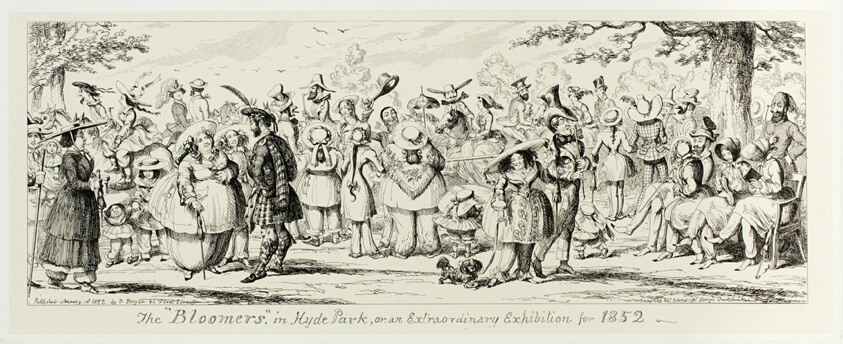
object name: Print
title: The "Bloomers" in Hyde Park, or an Extraordinary Exhibition for 1852 from George Cruikshank's Steel Etchings to The Comic Almanacks: 1835-1853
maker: George Cruikshank (English, 1792-1878); published by Pickering & Chatto (English, 19th century)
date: 1852, printed c. 1880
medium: Steel etching in black on cream India paper, laid down on off-white card (chine collé)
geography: England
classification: etching; paper; steel; print; prints and drawing